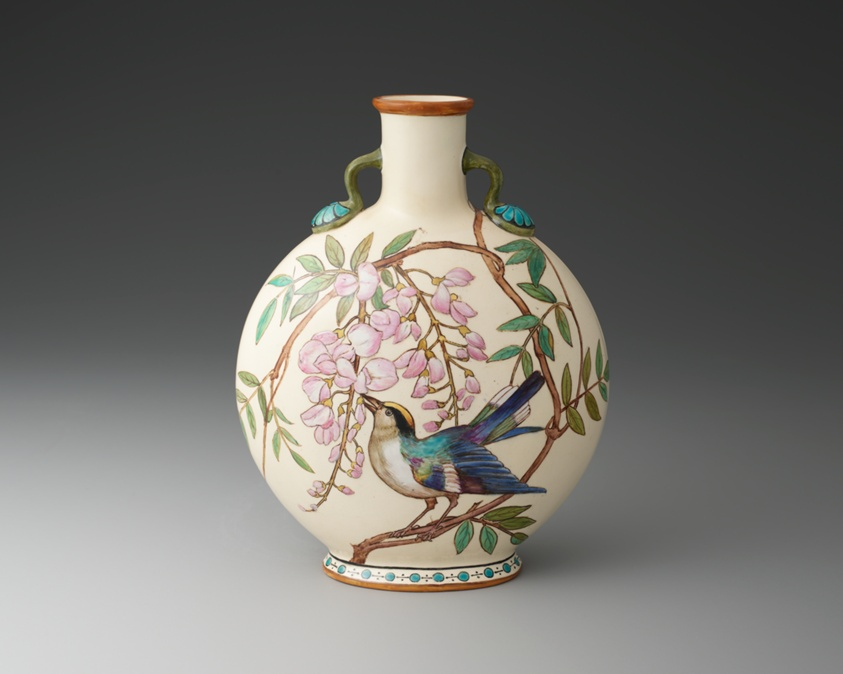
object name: Ceramics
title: Moon Flask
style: Aestheticism, 19th century, Aesthetic Movement, english, Japanism, japonism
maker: Minton's Art Pottery Studio (London, 1871-1875)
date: 1871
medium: Earthenware?, enamel, and gilding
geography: London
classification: ceramics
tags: vase, bird, moon